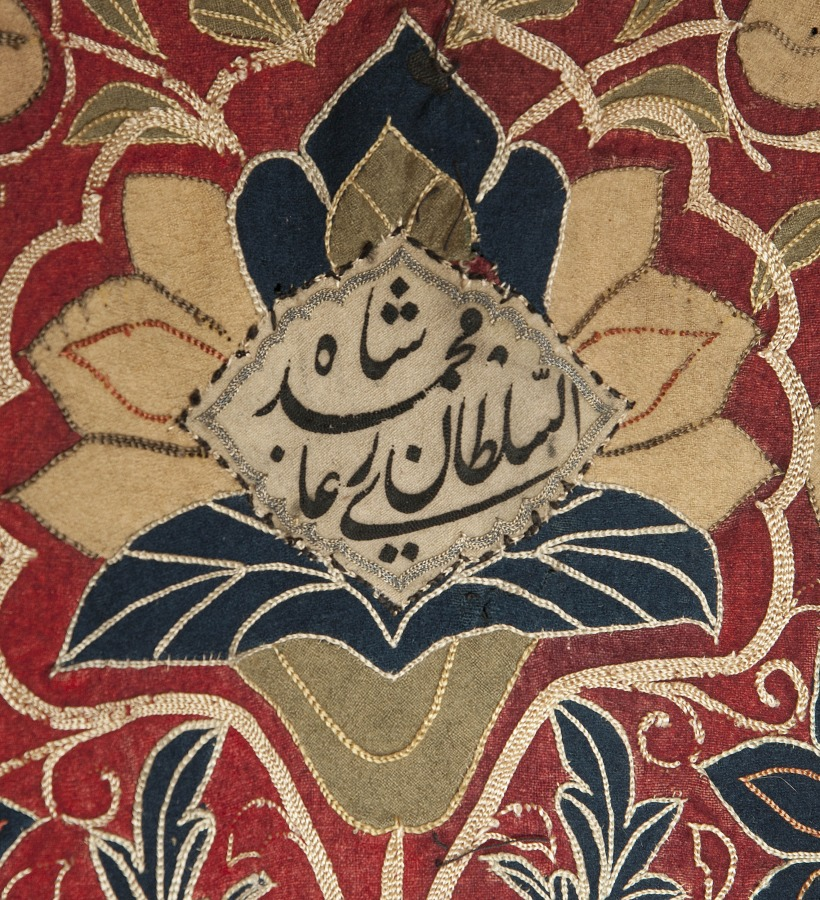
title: Royal Round Tent made for Muhammad Shah (wall panel with three design units)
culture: Iran, Rasht, Qajar period (1779-1925)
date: 1834–48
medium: Interior: wool: plain weave, inlaid work; silk: embroidery, chain stitch; tape, leather; Exterior: cotton, wool: plain weave; rope, iron ring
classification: Textile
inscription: Inscriptions: The central design unit of this wall panel has two embroidered inscriptions. 1. Upper inscription (center of the top blossom): "Muhammad shah sultan-e ghazi."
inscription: 2. Lower inscription (on the base of the vase): "Kamtarin bandeh-ye dargah fath'ali."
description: Royal tents were potent symbols of authority, wealth, and power throughout the greater Middle East. Rulers owned thousands of tents. They were used for shelter, shade, and innumerable functions in tent compounds that were essential for imperial ceremonies, travel, and military campaigns. Distinguished by size with elaborately decorated interior walls and ceilings, tents could be as large as castles. Opulent tents were also presented as imperial gifts. Tents are only known through documents before 1600. For example, in Baghdad in 809, Caliph Harun al-Rashid owned 4,000 ceremonial tents and 150,000 camping tents that were stored in the imperial Abbasid treasury. An astonishing variety and quantity of tents were housed in the royal Fatimid tent storeroom in Cairo in 1068-69, including "military tents, fortress tents, and castle tents, manufactured of . . . gold-brocaded stuff embroidered with designs of elephants, wild beasts, horses, peacocks, birds." Since 1600, Ottoman Turkish tents with elaborate floral decoration have been preserved in Istanbul in the Topkapi Palace Museum and Military Museum, and in European collections as war booty, primarily from the Ottoman Turks' attempt to conquer Vienna in 1683. These tents are not done in the Rasht technique, but rather are applique. In contrast, royal tents from Iran are extremely rare. This spectacular ceremonial tent is embroidered with the name of its owner, Muhammad Shah, who ruled Iran from 1834 to 1848 during the Qajar dynasty. The radiant jewellike interior features exuberant flora, blossoming vines, and robust birds made with colored wool embellished with silk-thread embroidery.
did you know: Rasht work is named after the city on the Caspian Sea in present-day Iran, which was a major silk trade center with numerous textile workshops.